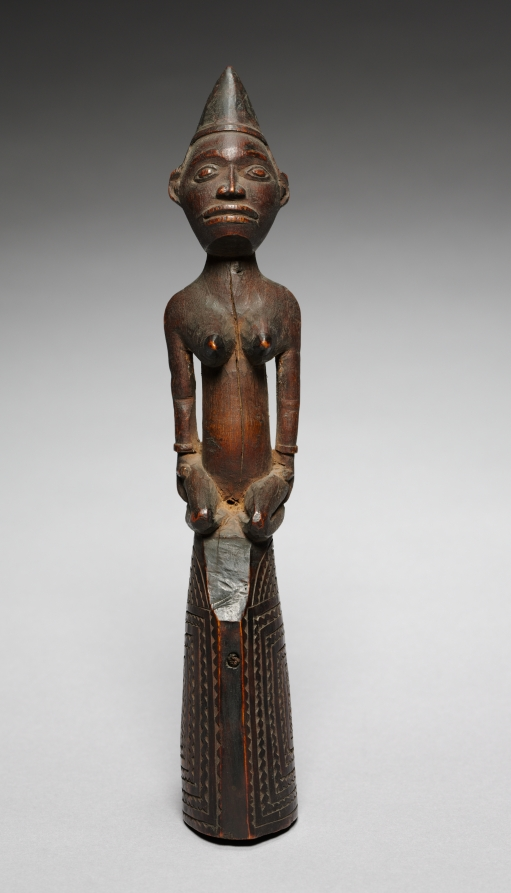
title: Bell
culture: Africa, Central Africa, Democratic Republic of the Congo, or Republic of the Congo, Kongo-style or Vili-style maker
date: early 1900s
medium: Wood and plant fiber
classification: Sculpture